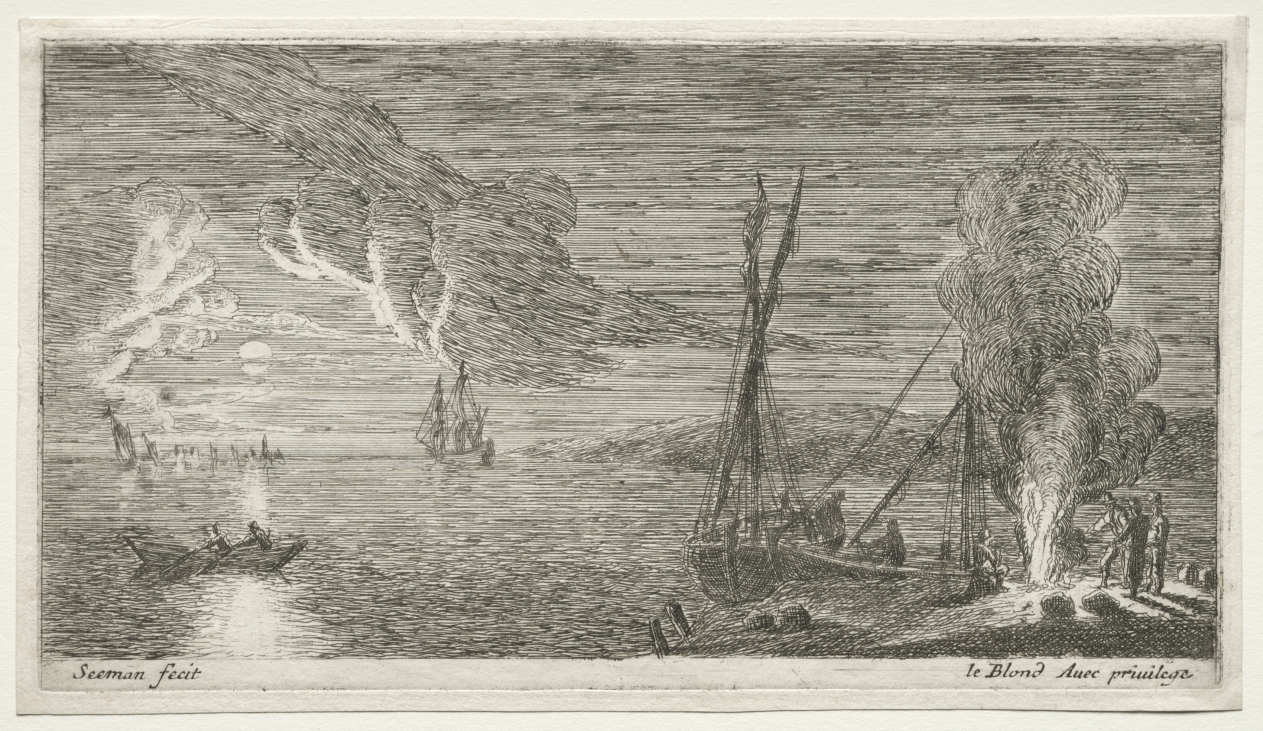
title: A Bonfire and Moonlight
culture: Netherlands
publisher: Jean Le Blond (French, 1584–1666)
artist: Reinier Nooms, called Zeeman (Dutch, c. 1623–1664)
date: 1650–67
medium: etching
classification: Print